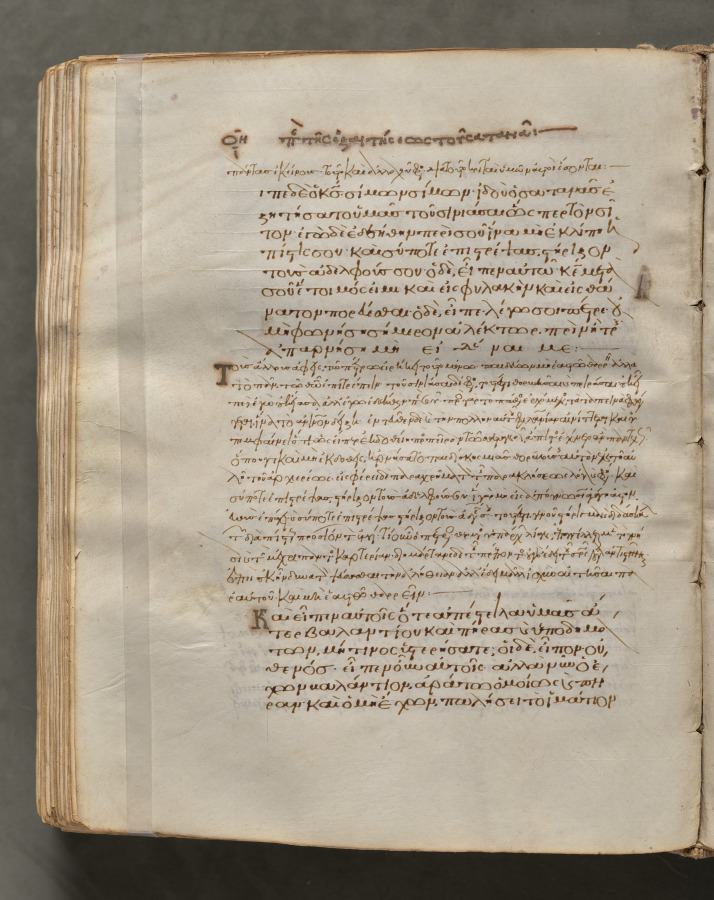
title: Text, folio 309 (verso), from a Gospel Book with Commentaries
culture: Byzantium, Constantinople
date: c. 1000–1100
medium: ink, tempera, and gold on vellum; leather binding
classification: Bound Volume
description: Each of the four gospels in this book opens on a page with brilliantly illuminated borders depicting the author of the text as well as birds—principally peacocks, symbols of the immortality of the soul—and fountains, representing the fountain of life and the salvation of the soul. This volume consists of 428 leaves with texts in Greek. Its level of sophistication suggests that it was probably written and decorated in a monastery in Constantinople.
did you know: Gospel books were carried in procession through Byzantine churches.